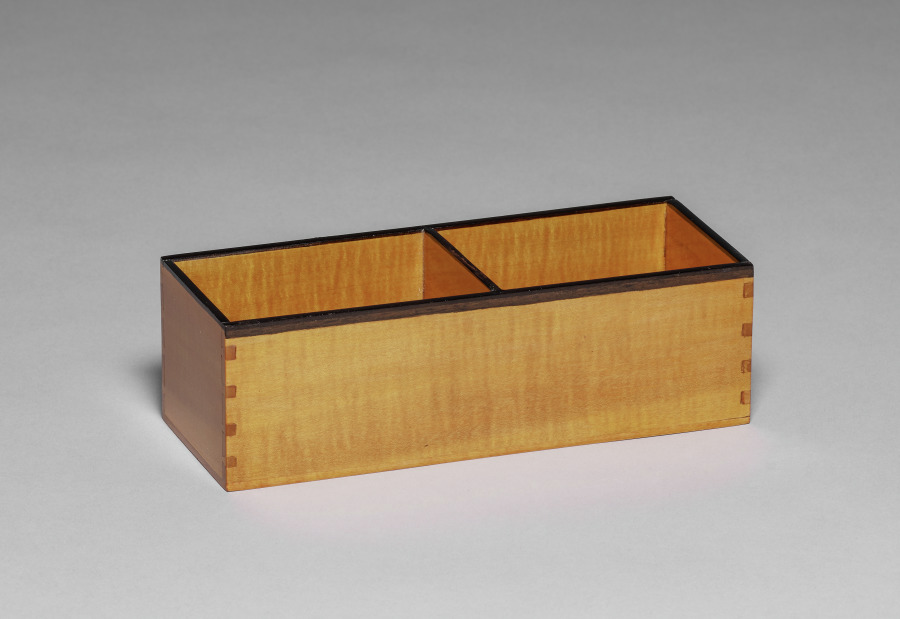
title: Divided Tray for a Globe Work Table (Globustisch)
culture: Austria, Vienna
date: c. 1810–15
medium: Burl walnut veneer, mahogany, ebony, satinwood, gilt wood, painted wood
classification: Furniture and woodwork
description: Work tables resembling globes were the usual form for a lady's sewing or writing table around 1800 in Austria. Combining moving parts, secret compartments, and highly finished decoration, these tables were also a way for the cabinetmaker to show off his skill. The tripod supports and temple-like architectural quality of both the exterior and interior decoration reflect the fashionable taste for neoclassical style, or Biedermeier as it was called in Austria, where Vienna was the center of such elaborate furniture production.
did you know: The top half of the globe rotates upward to reveal hidden compartments for sewing tools, threads, and unfinished fabric pieces.